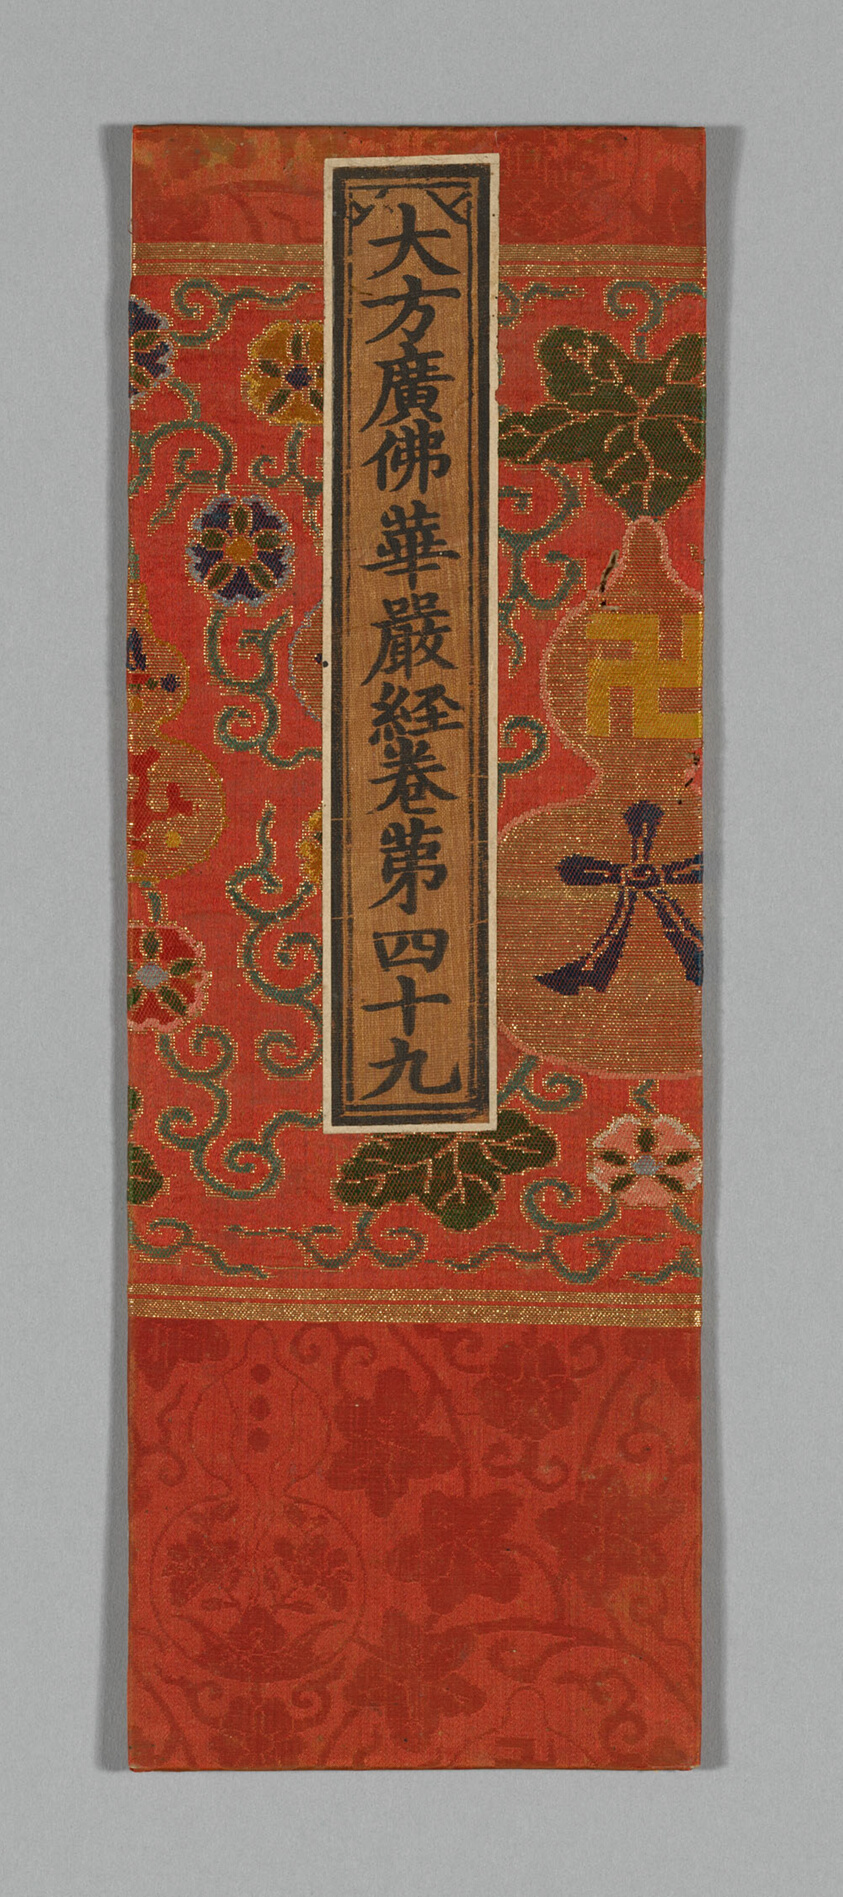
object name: Textile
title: Sutra Cover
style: ming, Chinese (culture or style), East Asian, asian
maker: China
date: Ming dynasty (1368–1644), c. 1590s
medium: Silk and gold-leaf-over-lacquered-paper-strips, satin damask weave with patterning and brocading; wrapped over cardboard and backed with paper; applied label of silk, plain weave; with inscribed title painted and/or printed with ink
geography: China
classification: textile; weaving